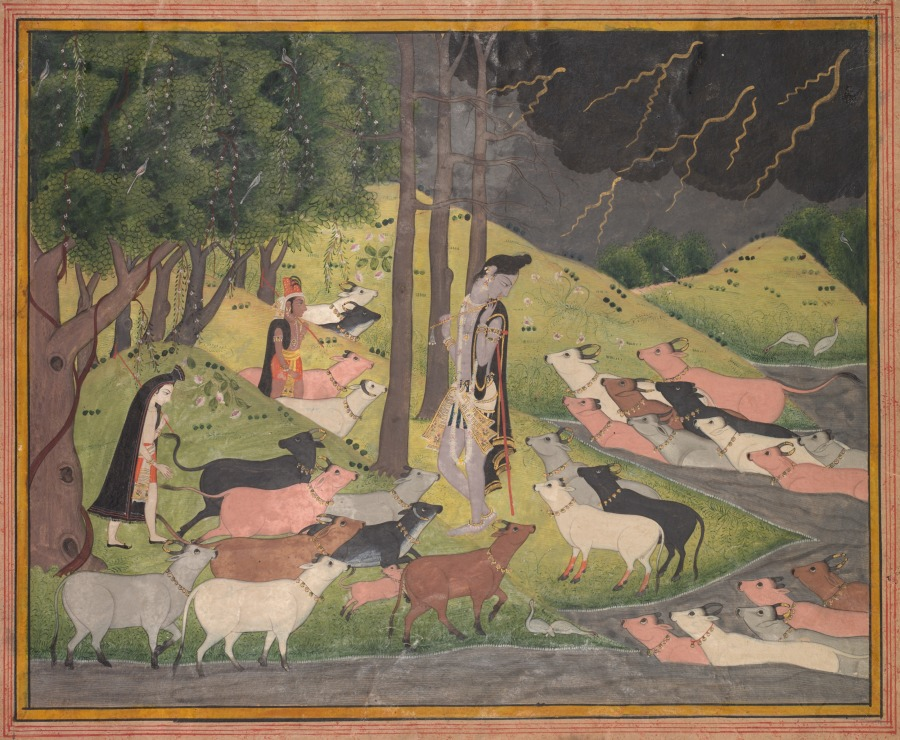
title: Krishna summoning the cows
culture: Northern India, Pahari kingdoms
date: c. 1780–90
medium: Gum tempera, ink, and gold on paper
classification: Painting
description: As a child, Krishna grew up in a community of cow herders. He is distinguished as supernatural by his blue-colored skin and his ability to mystically draw the cows to the sound of his flute. His brother, Balarama, has white skin and wears the herdsmen’s cloak over his head and carries a red herding staff.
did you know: The river Jamma, also known as the Yamuna or Jumna, flows across the foreground.